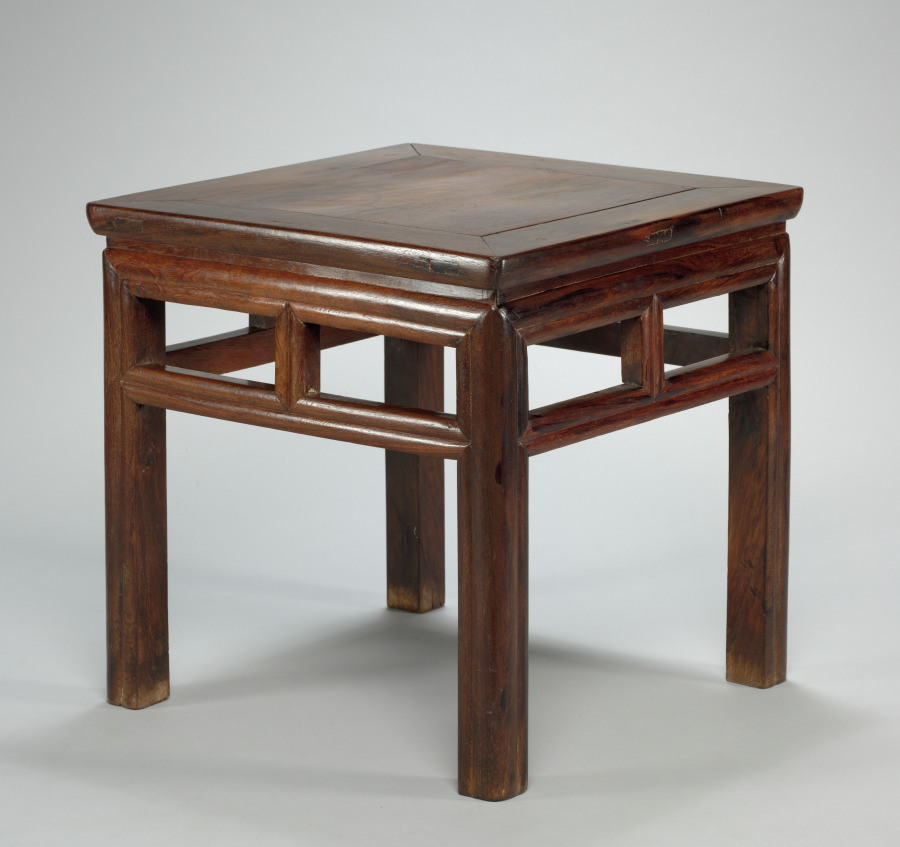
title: Stool (1 of 2)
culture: China, Qing dynasty (1644-1911)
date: 1700–1725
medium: Chicken-wing wood (jichimu)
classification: Furniture and woodwork